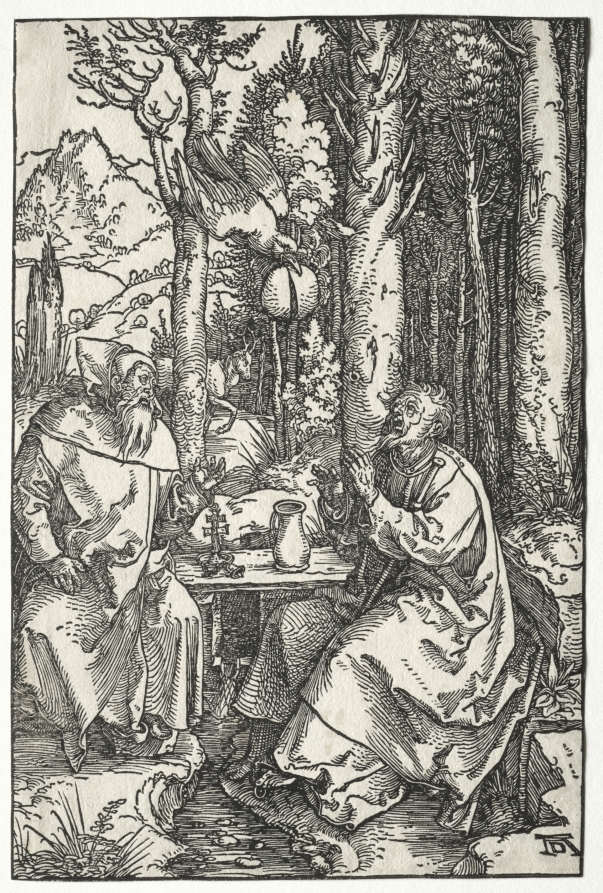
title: The Visit of St. Anthony to St. Paul the Hermit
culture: Germany, early 16th Century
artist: Albrecht Dürer (German, 1471–1528)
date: c. 1504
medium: woodcut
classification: Print